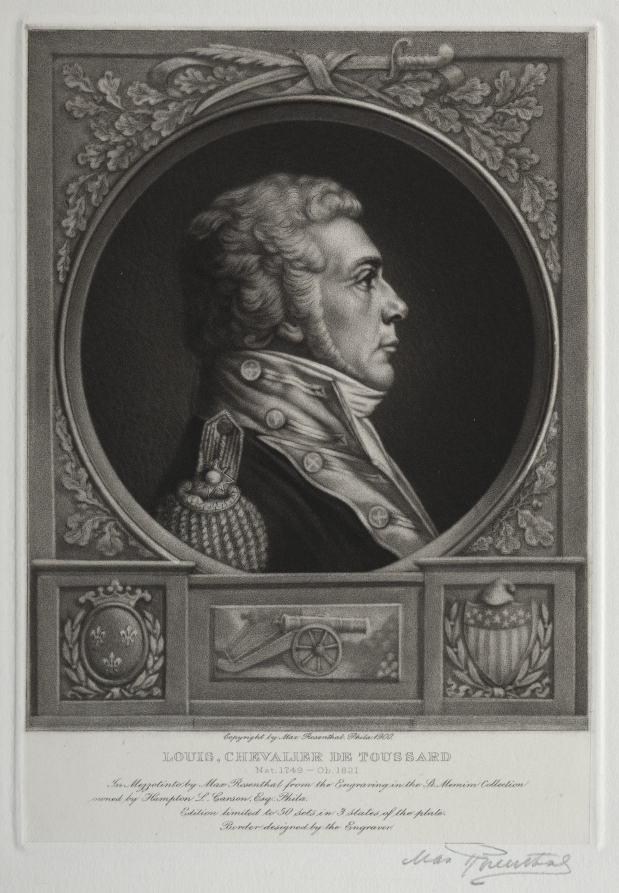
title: Louis, Chevalier de Toussard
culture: America, early 20th Century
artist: Max Rosenthal (American, 1833–1918)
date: 1900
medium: mezzotint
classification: Print